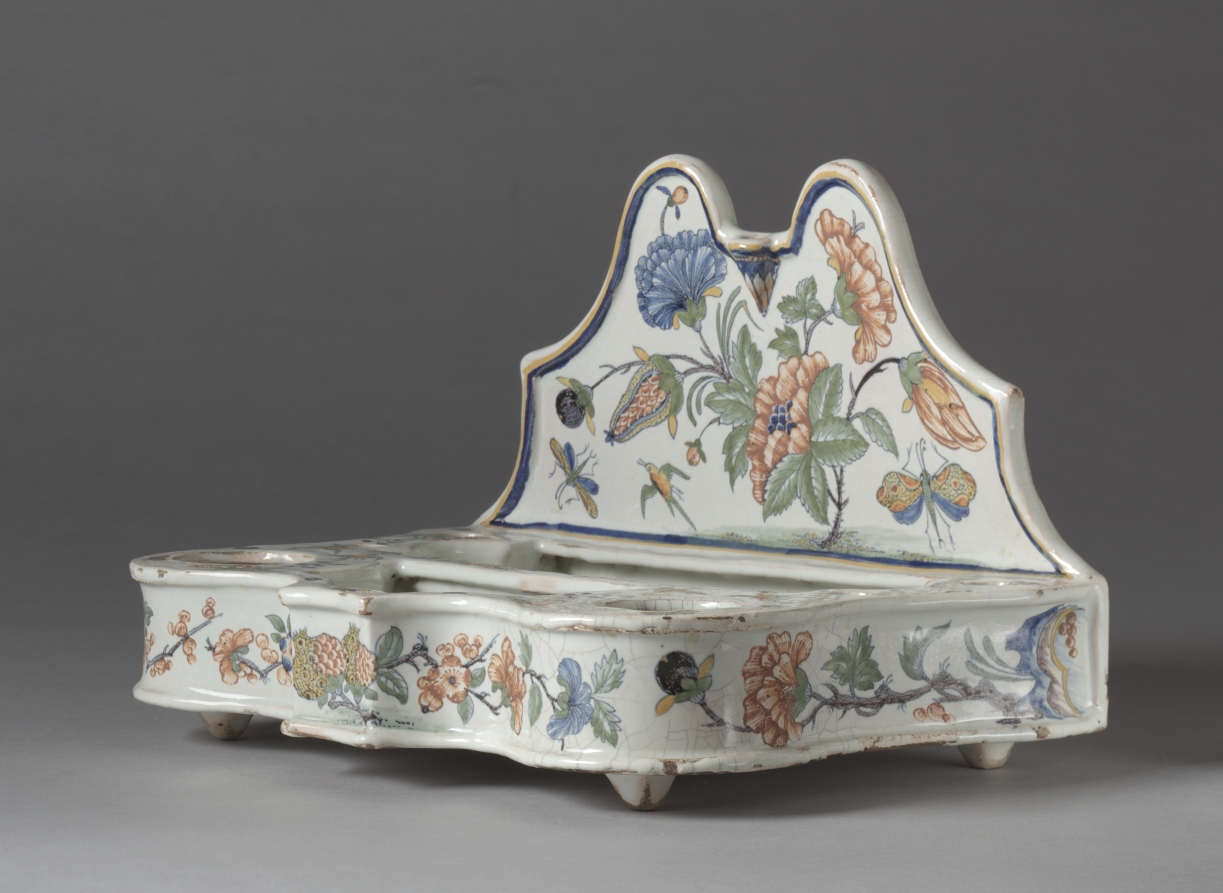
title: Writing Stand with Inkwells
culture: France, Sinceny, 18th century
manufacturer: Sinceny Factory (French)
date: 1746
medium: Tin-glazed earthenware (faience) with enamel decoration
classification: Ceramic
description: The faience factory at Sinceny was an offshoot of that at Rouen. In style, Sinceny closely resembles later Rouen wares with polychrome decoration. The stylized flowers and insects which decorate this writing stand are entirely typical of Sinceny faience.